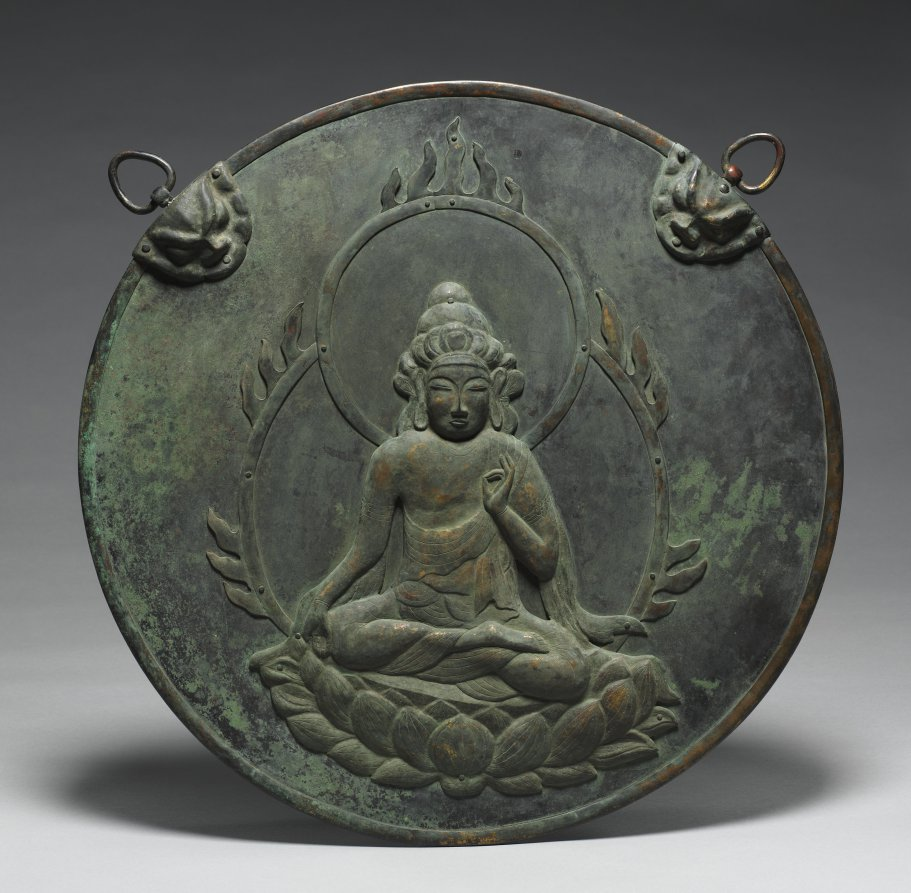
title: Votive Hanging with Image of Kannon (Kannon Kakebotoke)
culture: Japan, Nanbokuchō period (1336–92)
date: mid- to late 1300s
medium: Bronze with repoussé and etching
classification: Sculpture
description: Kakebotoke (literally “hanging Buddhist deities”) like this appeared from the latter part of the Heian period. They often hung on the doors of a Shinto shrine hall to indicate the Buddhist manifestation of the god, or kami, inside, or along the eaves of a Buddhist temple hall to indicate the Buddhist deity celebrated there.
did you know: Here the deity Kannon sits on a lotus flower, a symbol of purity and enlightenment.